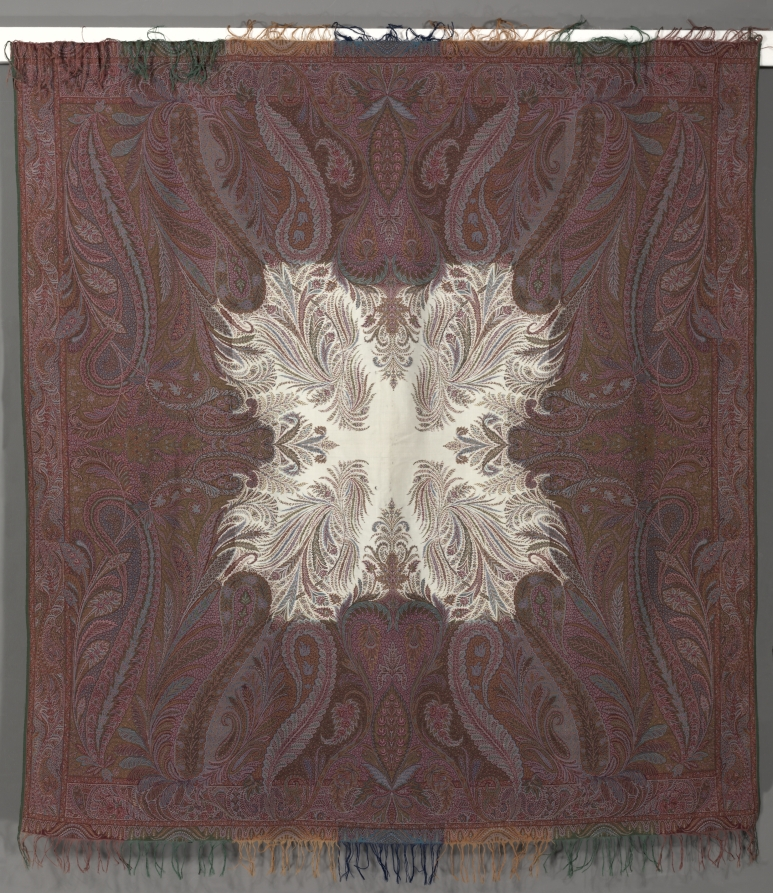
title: Square shawl with Quarter Shawl Layout and Ivory Center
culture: Austria, England, France, or Scotland, 19th century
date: 1848–51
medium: wool; 3/1 twill weave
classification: Textile